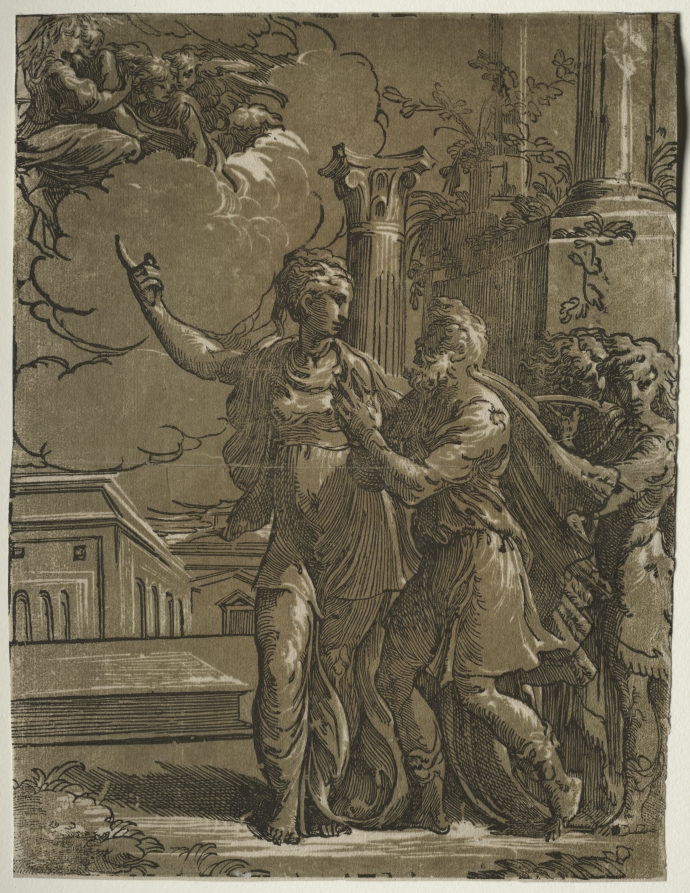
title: Tiburtine Sibyl and the Emperor Augustus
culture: Italy, 16th century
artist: after Parmigianino (Italian, 1503–1540)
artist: Antonio da Trento (Italian, c. 1508–c. 1550)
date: c. 1527–30/31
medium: chiaroscuro woodcut (in brown-green and black)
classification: Print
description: This print depicts the Roman Emperor Augustus (reigned 27 BC–AD 14) and the Tiburtine Sybil, one of several women that Apollo bestowed with prophetic powers. Augustus was deciding whether or not to accept apotheosis (recognition of the emperor as a god after death) and asked the Tiburtine Sybil for advice. At the moment the two met on the Capitoline Hill, the Madonna and Christ the Child appeared before them, revealing the coming of the child as the one who would have surpassed Augustus in ruling the world. Upon the site of the vision, Augustus had built an altar, the Aracoeli. Later, on the same spot, the church of Santa Maria in Aracoeli was erected. Antonio da Trento probably made this print under the direct supervision of Parmigianino. In later printings, Antonio da Trento's line block went through two state changes. The CMA example represents the second state, characterized by the addition of hatching to the cheek of the attendant at the left of the composition.